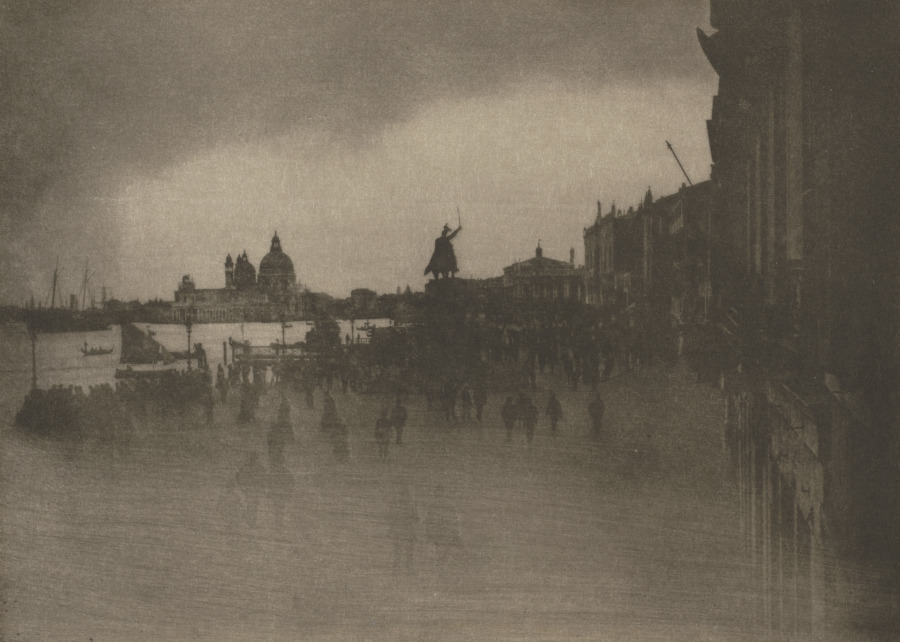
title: Camera Work: The Riva Schiavoni, Venice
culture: England, 20th century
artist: J. Craig Annan (British, 1864–1946)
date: 1904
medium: photogravure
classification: Bound Volume